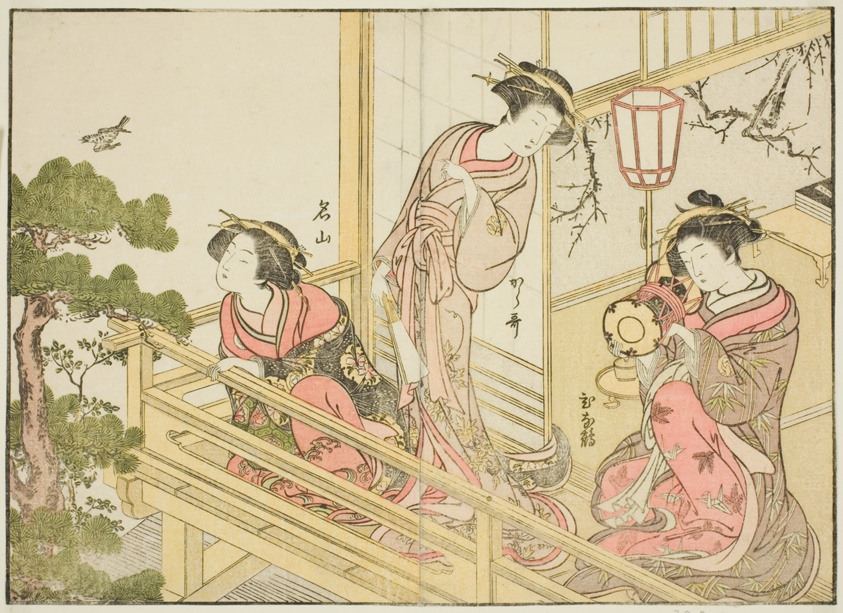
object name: Print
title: Courtesans of the Chojiya, from the book "Mirror of Beautiful Women of the Pleasure Quarters (Seiro bijin awase sugata kagami)," vol. 1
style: Japanese (culture or style)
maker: Katsukawa Shunsho; Japanese, 1726-1792; Kitao Shigemasa; Japanese, 1739-1820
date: 1776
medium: Color woodblock print; double-page illustration cut from a book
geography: Japan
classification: woodblock print; print; asian art